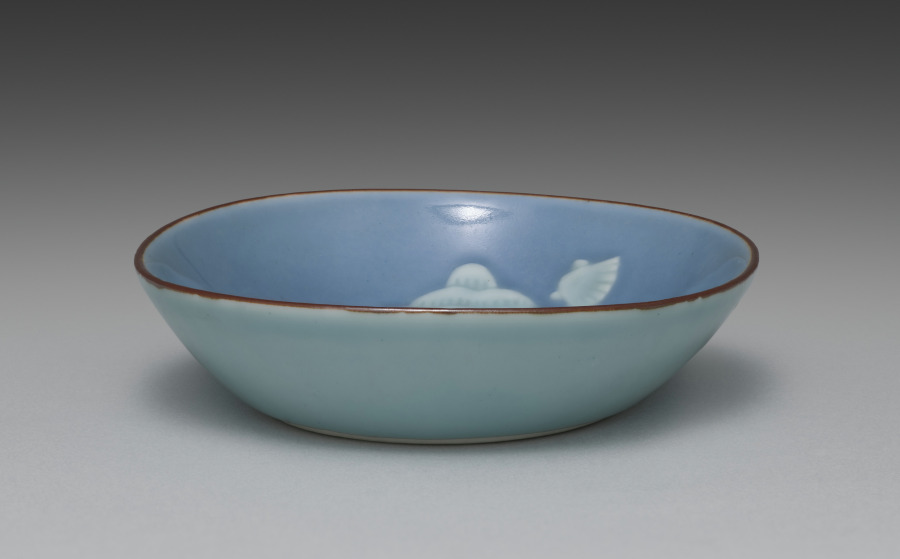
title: Dish from Dishes with Shells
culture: Japan, Meiji period (1868–1912) or Taishō period (1912–26)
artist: Seifū Yohei IV (Japanese, 1872–1951)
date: 1914–46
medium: One from a set of five dishes; porcelain with blue glaze, iron oxide, and molded design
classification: Ceramic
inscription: 清風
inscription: 清風造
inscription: 清風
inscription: 成山清風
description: Yohei IV chose an aquatic theme for this set of five mukōzuke, side dishes. He added an iron oxide rim and used a concentrated blue glaze on both the interior and exterior. The glaze, named on the box lid, is his father’s “evening moon” (tsukiyoi) color. The conch in relief takes up the entire bottom of the dish. Up the sides are two snails on one end and on the other a scallop. This results in a boldly graphic, less realistic effect.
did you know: This set of dishes, mukōzuke, could be used for serving small side dishes at a tea gathering.